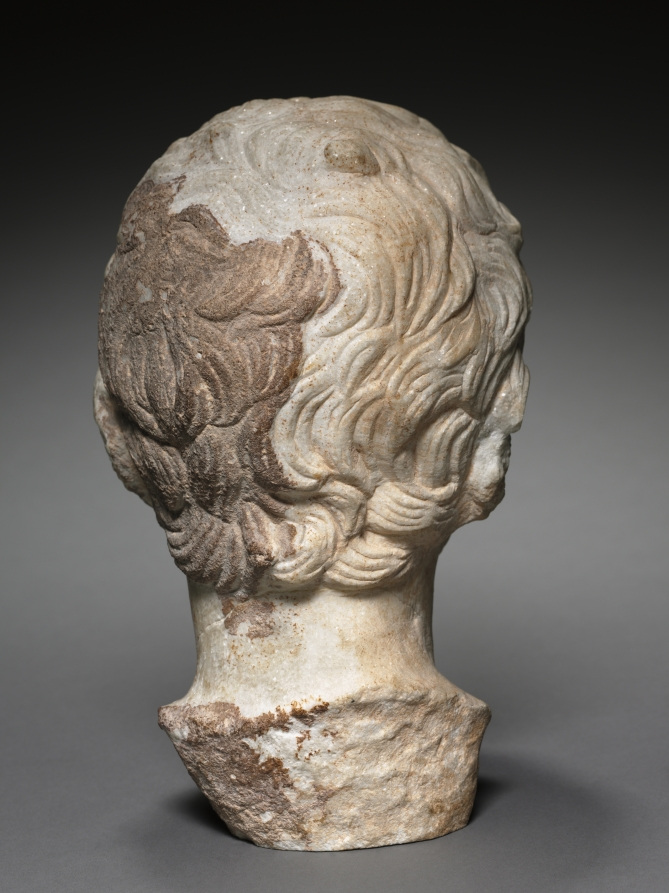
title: Portrait Head of a Youth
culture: Egypt, Alexandria, Roman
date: 1–100 CE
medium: marble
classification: Sculpture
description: Several unusual features of this head suggest that its carving was never finished in antiquity. These include unfinished hair around the ears, small bumps remaining in the hair near the front and top of the head, and the lack of a finely polished surface. Although said to have been found in Egypt, the head is carved of dolomitic marble thought to come from the Saliari region of the northern Greek island of Thasos.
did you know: The carving of this head was never finished.